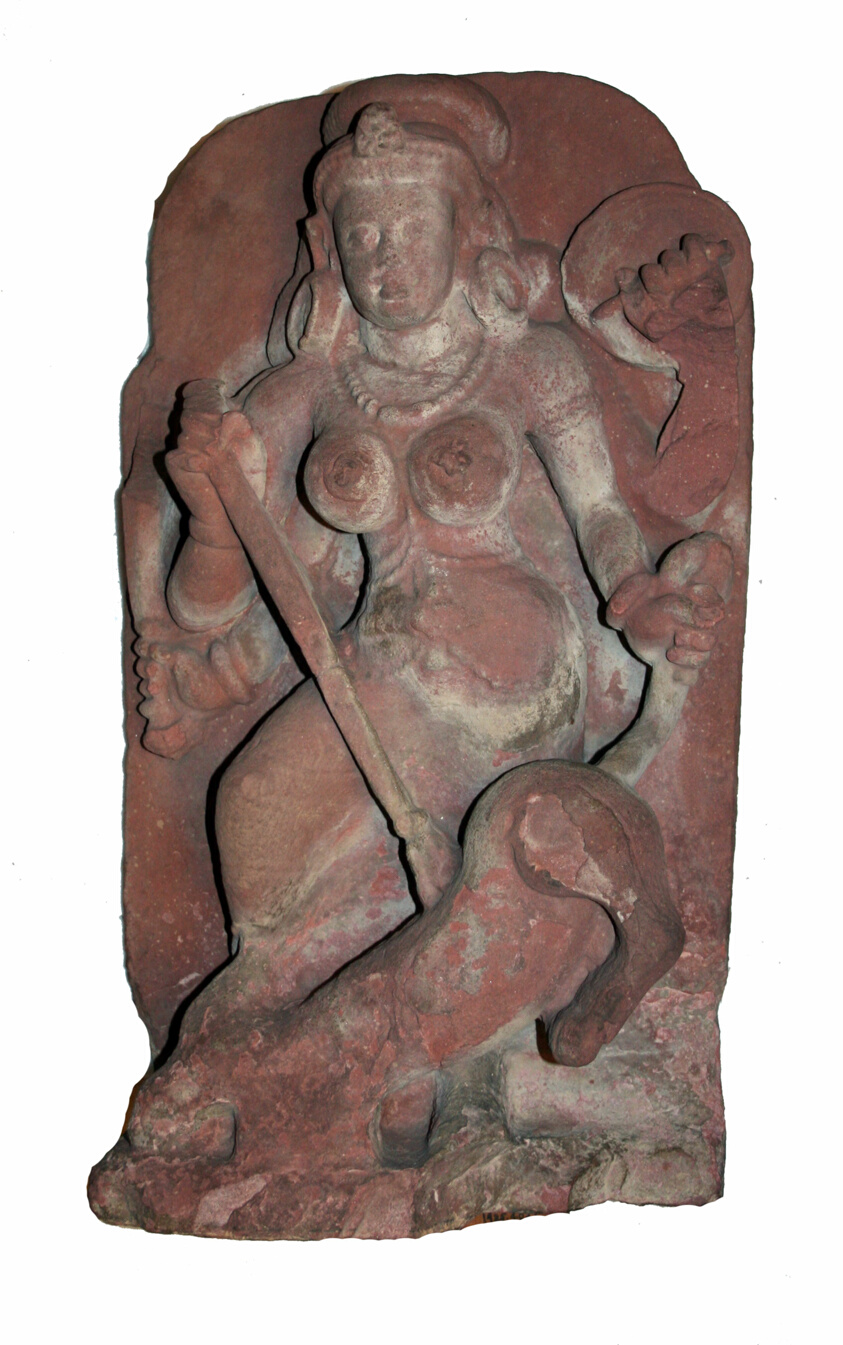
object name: Sculpture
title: Goddess Durga Slaying the Buffalo Demon (Mahishasuramardini)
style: South Asian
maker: India; Uttar Pradesh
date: 5th/6th century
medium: Red sandstone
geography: Uttar Pradesh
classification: stone (unidentified); stone; sculpture; asian art